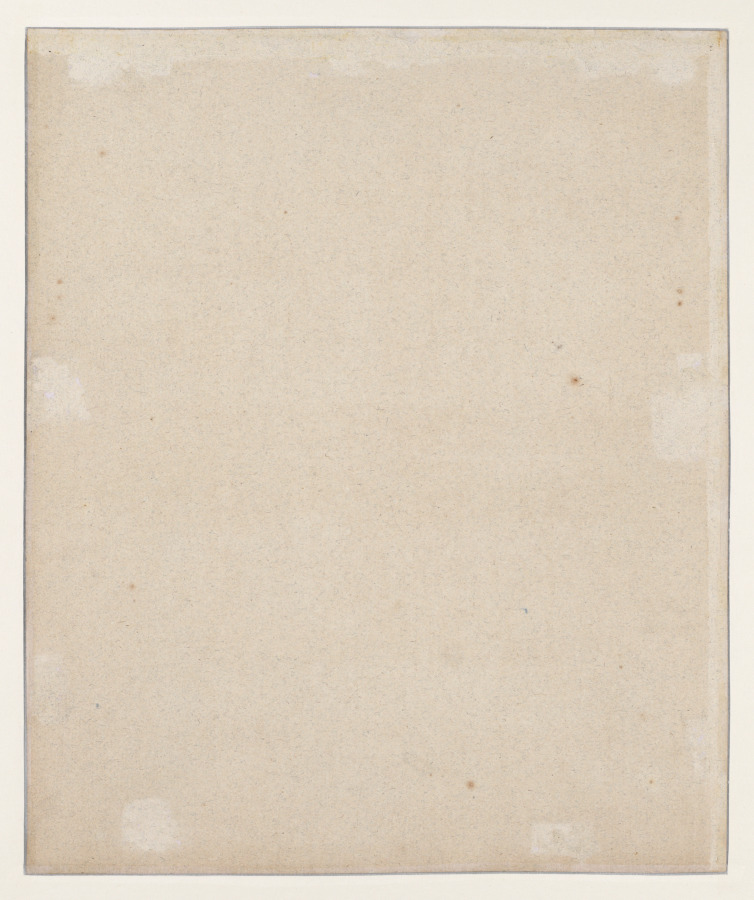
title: Salome with the Head of John the Baptist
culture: Netherlands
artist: Nicolaus Knupfer (Dutch, 1603–1655)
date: c. 1650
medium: pen and brown ink, brown washes and white heightening (oxidized), over black chalk on antique laid paper; framing lines in pen and brown ink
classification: Drawing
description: The Utrecht artist Nicolaes Knupfer was known for depicting powerful women who outsmarted or overpowered men. This drawing, probably a study for a painting, depicts the New Testament story of Salome, who was granted a wish by King Herod after dancing for him. Encouraged by her mother, Herodias, Salome asked for the head of John the Baptist, against whom Herodias bore a grudge for objecting to her marriage to the king. The scene shows the theatrical moment after the beheading, when a stoic Salome holds a salver to receive the head.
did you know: The stoic Salome in this drawing awaits the head of John the Baptist so that she can deliver it to King Herod on a salver.